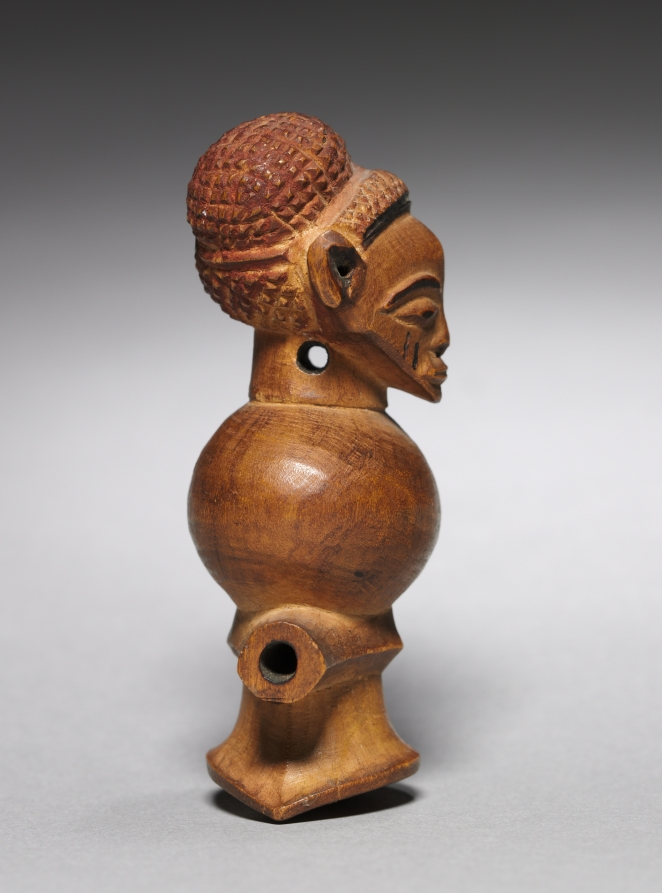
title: Whistle (kasengosengo)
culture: Africa, Central Africa, Democratic Republic of Congo, Pende-style maker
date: before 1915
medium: wood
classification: Musical Instrument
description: This small whistle displays a finely detailed head with bi-lobed coiffure similar to Pende masks.